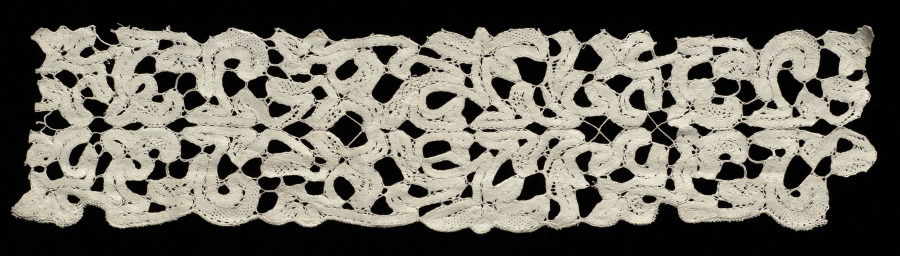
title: Lace Edging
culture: Europe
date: 1800s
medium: Linen: bobbin lace (tape lace)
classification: Lace